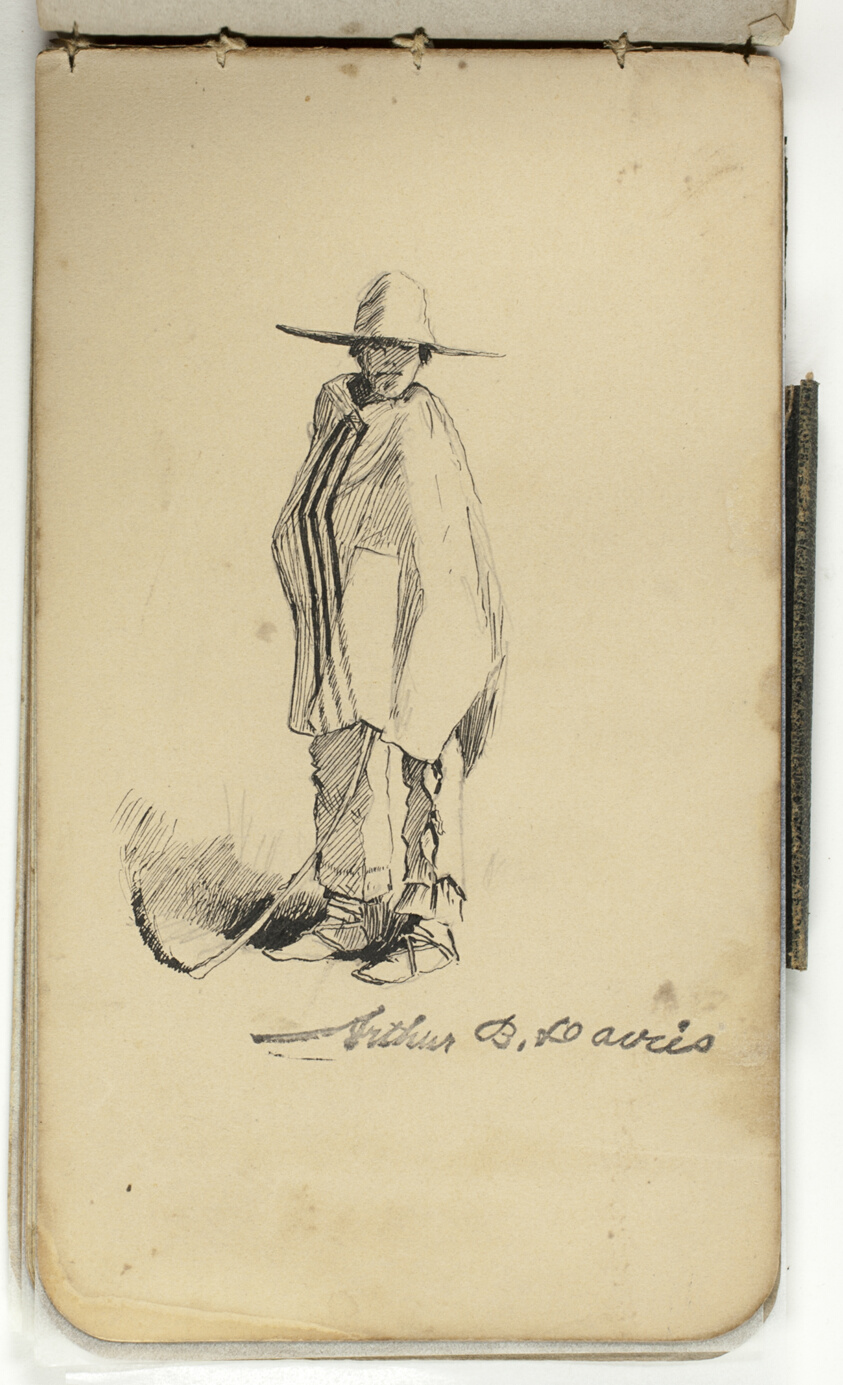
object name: Drawing and Watercolor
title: Sketchbook II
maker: Arthur B. Davies (American, 1862-1928)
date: 1881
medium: Maroon buckram cover, tinted paper pages with designs in graphite and watercolor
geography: United States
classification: sketchbook; graphite; prints and drawing; paper